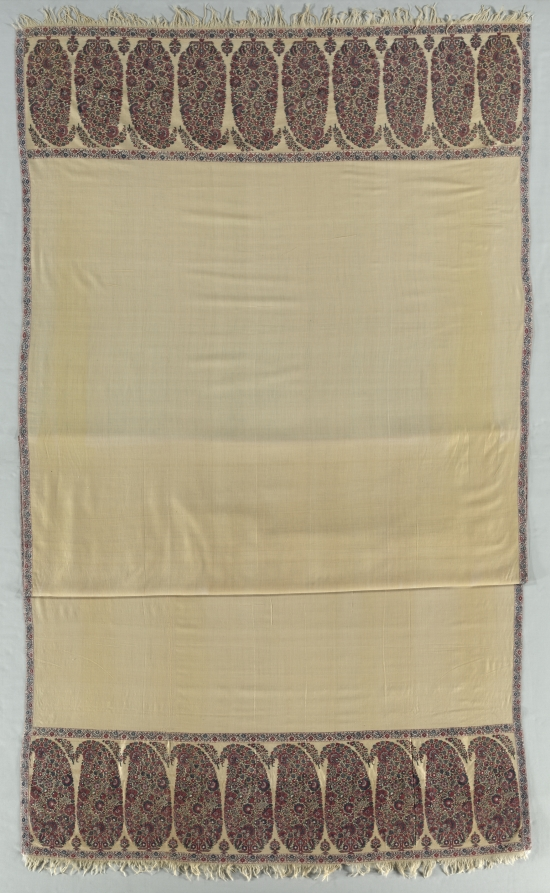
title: Yellow Long Shawl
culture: India, Kashmir, Afghan period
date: before 1815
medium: 2/2 twill tapestry weave [S], double interlocking; wool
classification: Textile